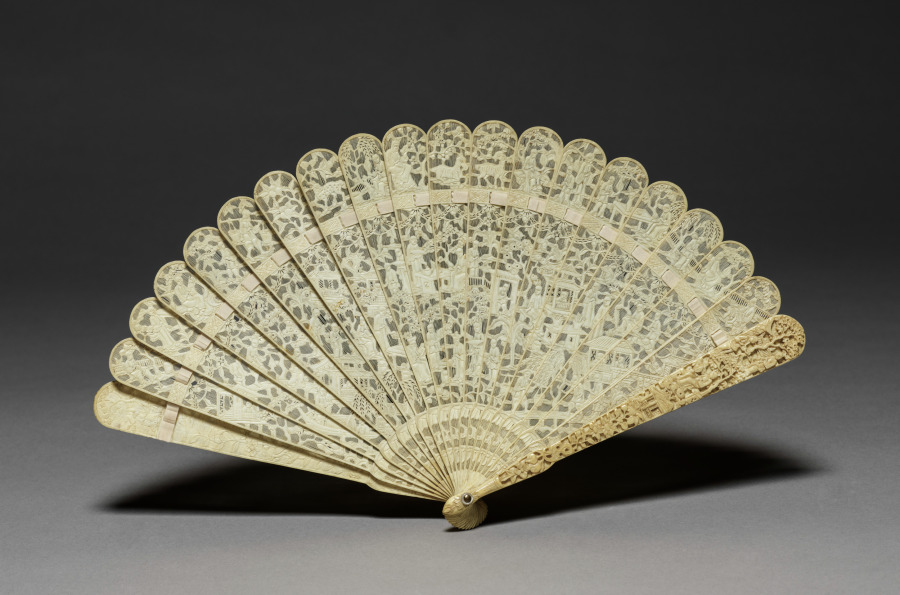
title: Fan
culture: China, 20th century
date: 1900s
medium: ivory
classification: Ivory